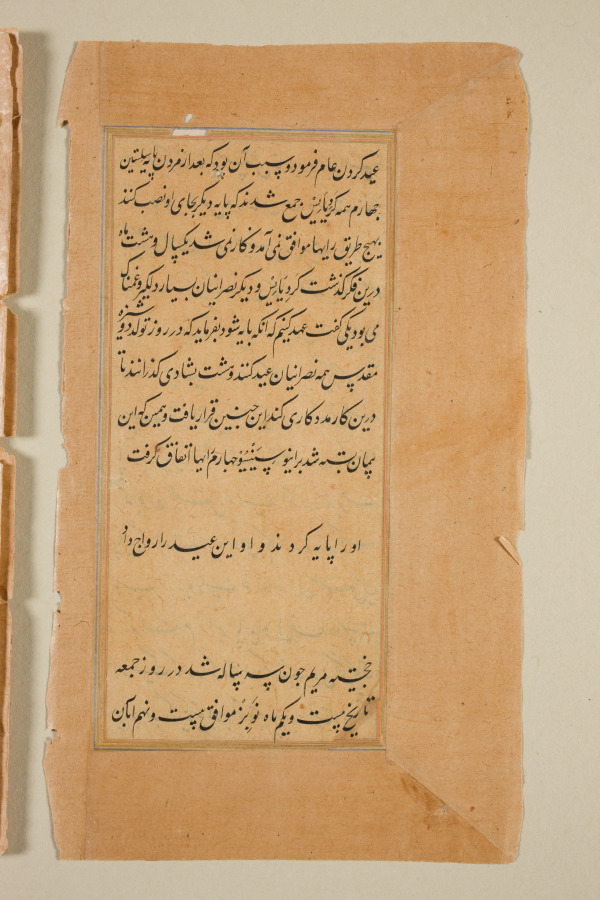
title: Text, Folio 8 (verso), from a Mirror of Holiness (Mir’at al-quds) of Father Jerome Xavier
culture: Mughal India, Allahabad, made for Prince Salim (1569–1627)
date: 1602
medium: Ink and gold on paper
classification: Manuscript